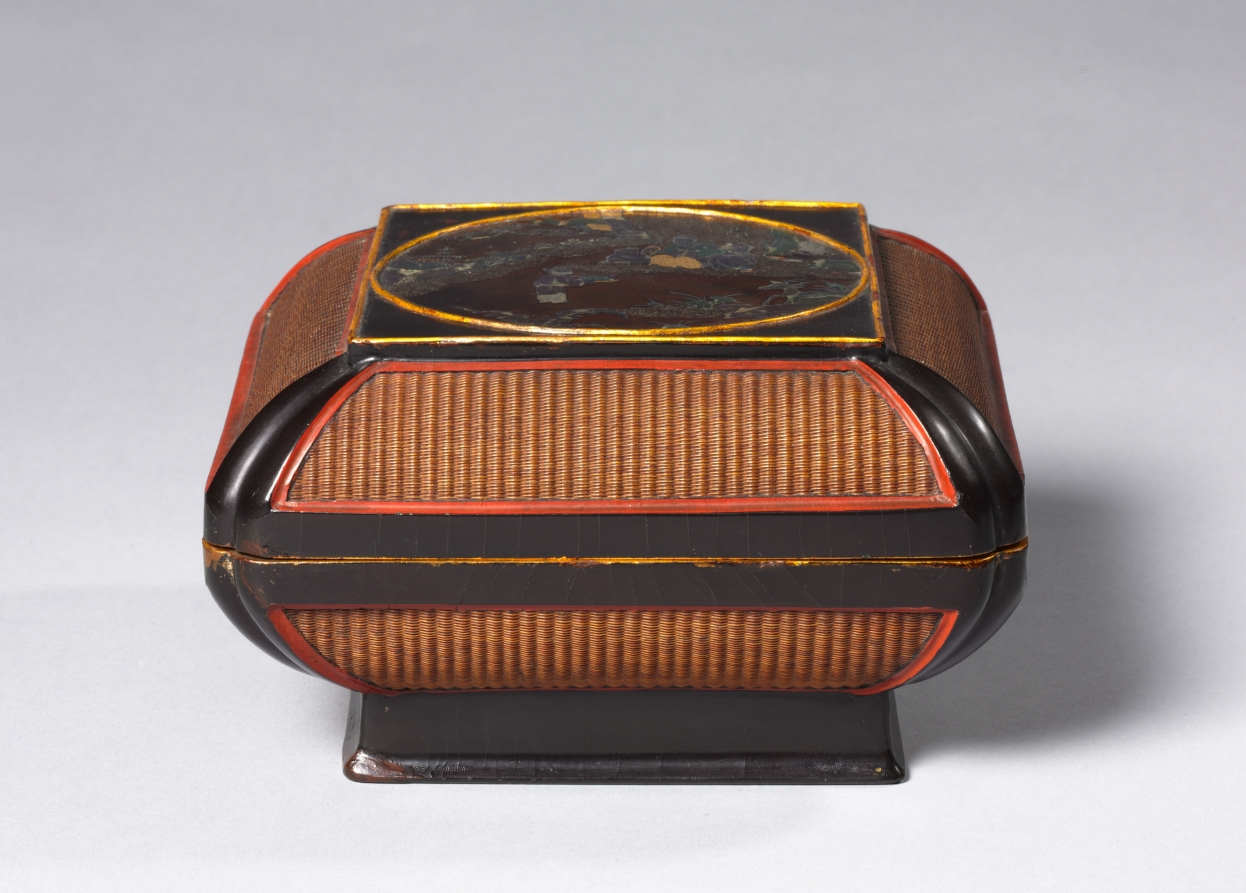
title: Wickerwork Box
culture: China, Ming dynasty (1368-1644), Wanli reign (1572-1620)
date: 1609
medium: lacquered wickerwork (of woven bamboo) framed in wood with circular scene inlaid in mother-of-pearl and gold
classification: Lacquer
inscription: Inscription at bottom in red on black lacquer reads: "commissioned by Yü-Yün-ch'i".